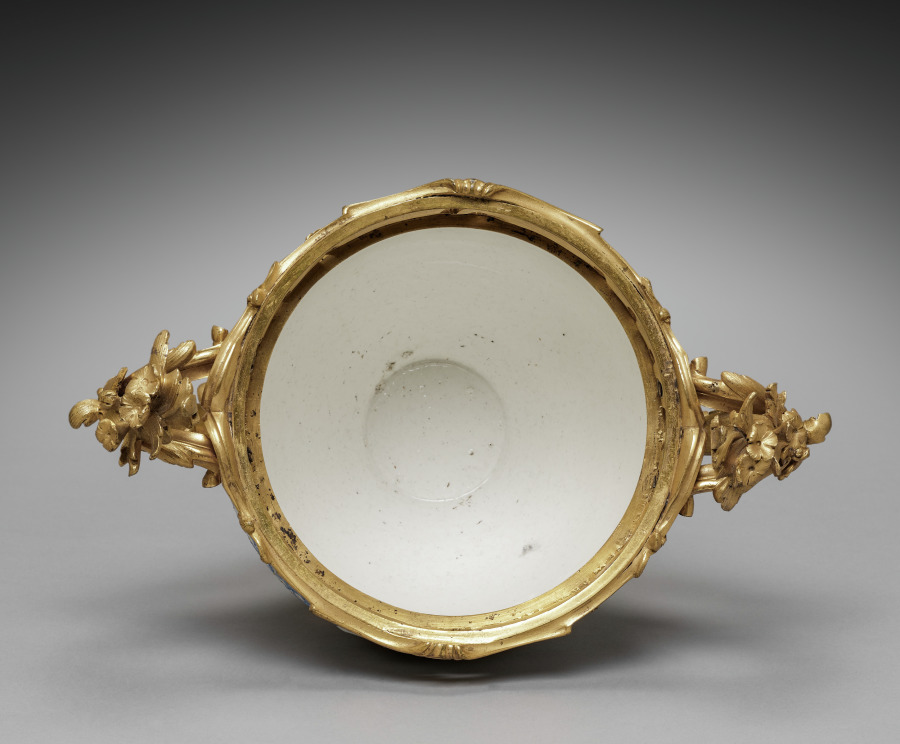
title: Vase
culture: Germany, Meissen, 18th century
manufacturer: Meissen Porcelain Factory (German, est. c. 1710)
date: 1749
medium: porcelain mounted in gilt bronze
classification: Ceramic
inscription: on obelisk located in one of the cartouche openings, the date 1749 appears.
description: One of these vases is dated 1749. They were perhaps part of a set of four covered vases that we know from documents were acquired by Mme. de Pompadour, mistress of Louis XV in 1752.